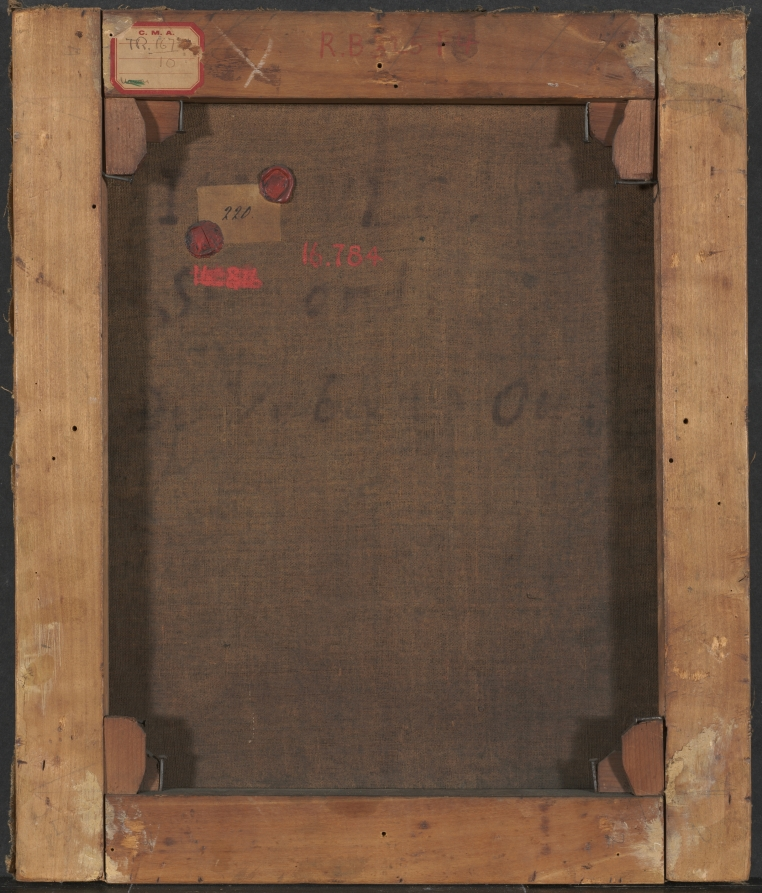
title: Martyrdom of Saint Andrew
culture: Italy, 17th century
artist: copy after Guido Reni (Italian, 1575–1642)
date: 1600s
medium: oil on canvas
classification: Painting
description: This small devotional picture by an anonymous 17th-century Venetian artist drew his composition from Guido Reni's large St. Andrew Led to Martyrdom fresco in Rome's Church of San Gregorio al Celio. The CMA painting portrays the central image of Reni's 1608 fresco by Reni. St. Andrew and his brother Peter were apostles of Christ and left all of their possessions to follow him. Andrew was martyred in Achaea. He requested to be crucified on the X-shaped cross because Andrew considered himself unworthy of dying on the same cross as Christ. Reni depicted an X-shaped cross in the fresco, while in this painting, the Latin cross is used. The Latin cross was common to Northern art, suggesting that the artist of this painting may have been Venetian. This representation of St. Andrew's martyrdom focuses on St. Andrew's adoration of the cross. The CMA version does not possess the chaos of Reni's larger scene, focusing instead on the central four figures, whereas in the original, a crowd of people surrounds the central group. The figure on the left bends in an unnatural pose and lacks the precision of Reni's original forms, suggesting that this piece is by another artist. The cross, originally seen in the distance, appears in the foreground of the smaller work, brought closer to St. Andrew to emphasize his relationship with God and his acceptance of his coming death.